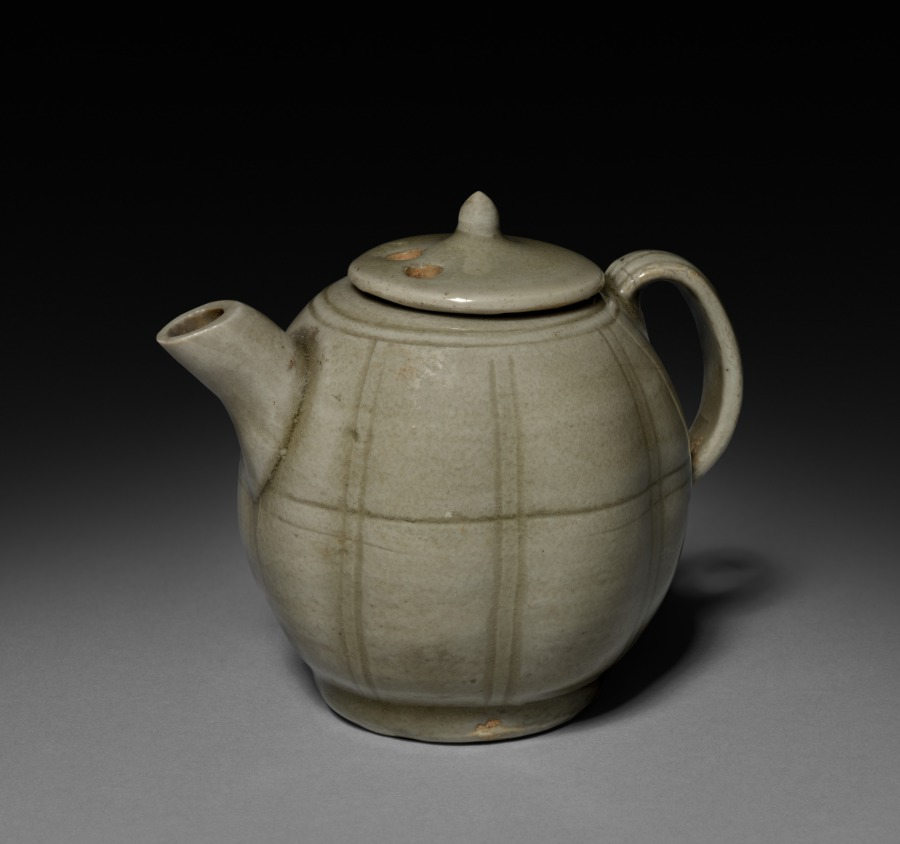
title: Wine Pot: Southern Celadon Ware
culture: China, Southern Song Dynasty (1127-1279) - Yuan Dynasty (1271-1368)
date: 1200s-1300s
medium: glazed porcelain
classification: Ceramic